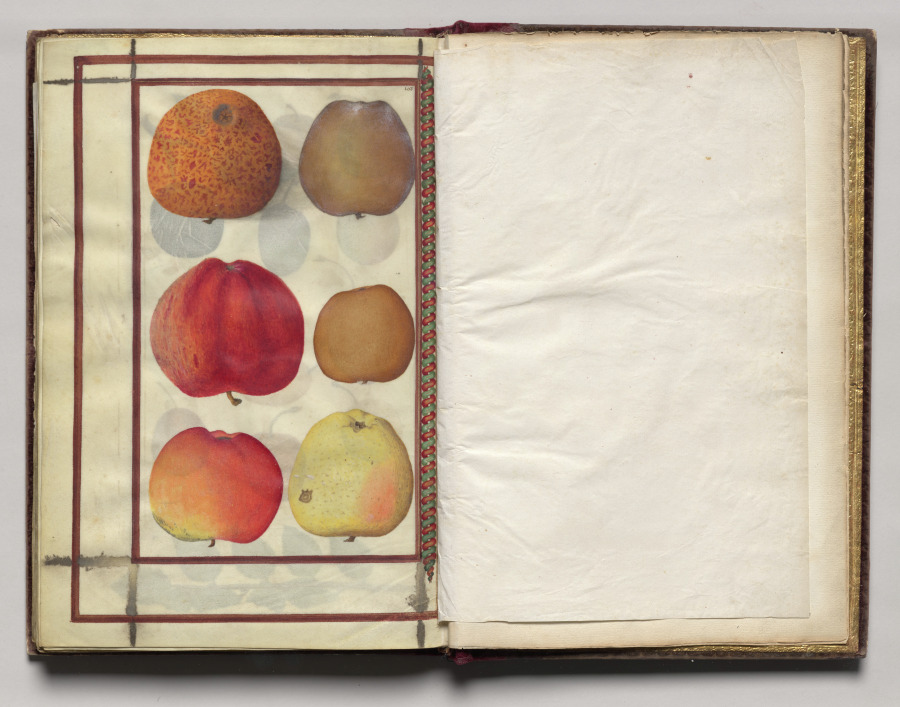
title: Apples, folio 48 (verso), from Florilegium (A Book of Flower Studies)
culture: France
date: 1608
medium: watercolor, ink, silver, and gold over occasional traces of pencil, on vellum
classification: Bound Volume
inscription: Dated: Poitiers 1608 (on frontispiece) Signed: On frontispiece in black ink, lower right: Van Kuyk Notation on drawing: Frontispiece: in pencil, lower margin: * élève de Van Kessel, peintre flammand (* in pencil also appears in front of Van Kuyk's name).